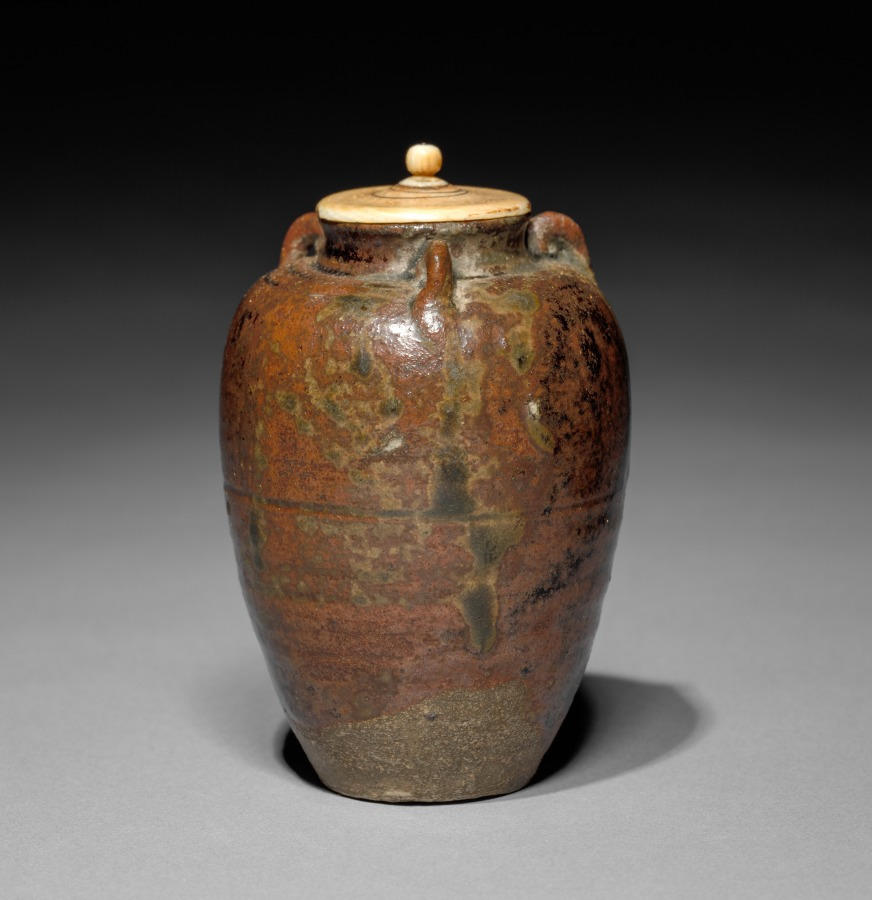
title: Tea Caddy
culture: Japan, Edo period (1615–1868)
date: 1700s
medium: porcelain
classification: Ceramic